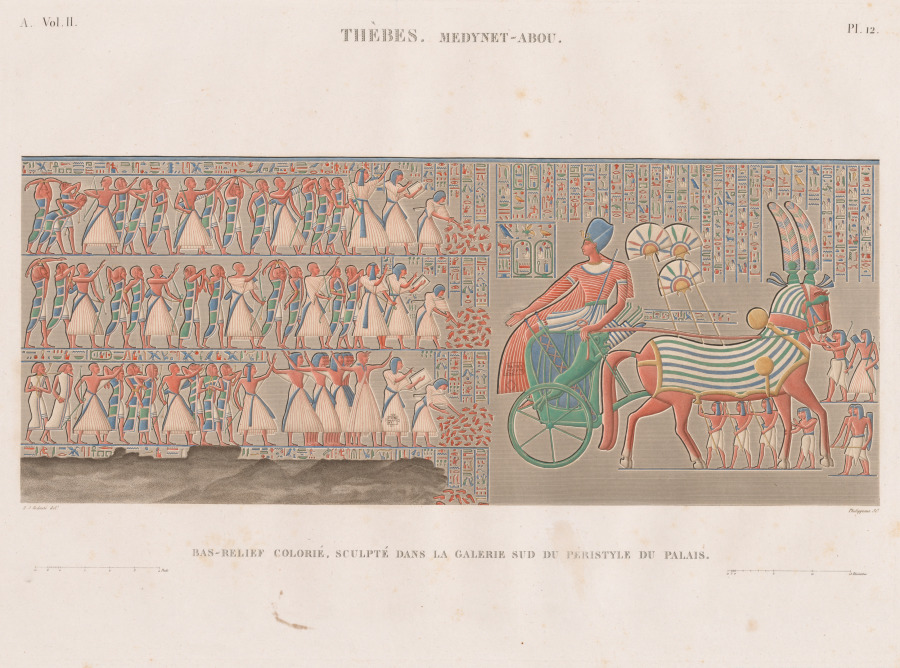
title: Description of Egypt: Thebes. Medynet-Abou, Vol. II, Pl. 12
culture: France, 19th century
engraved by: Antoine Phelippeaux (French, 1767–1830)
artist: after Henri Joseph Redouté (French, 1766–1853)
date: 1822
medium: engraving, hand-colored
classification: Print